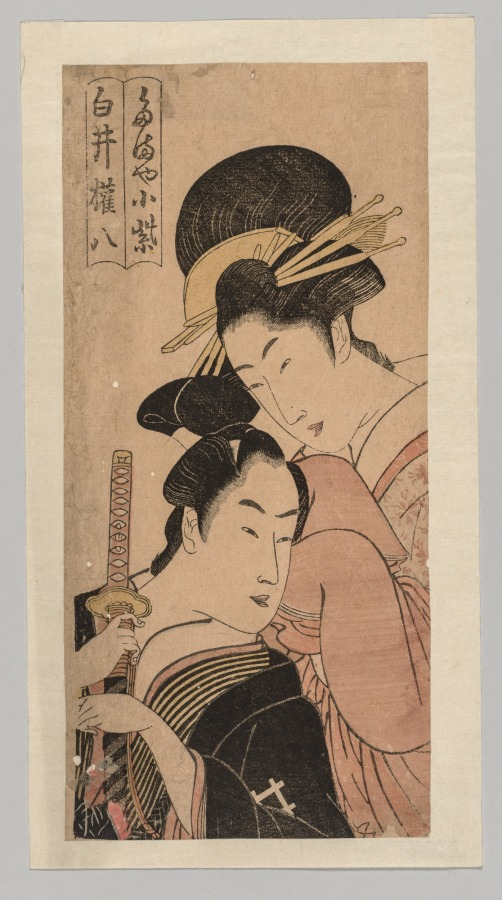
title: Komurasaki of the Miuraya and Shirai Gonpachi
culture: Japan, Meiji period (1868–1912) to Shōwa period (1926–89)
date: c. 1868–1943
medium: color woodblock print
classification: Print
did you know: This unsigned work shows two actors portraying the "based on real events" story of ill-fated lovers. It may have been inspired by the work of print designer Kitagawa Utamaro on the same theme.